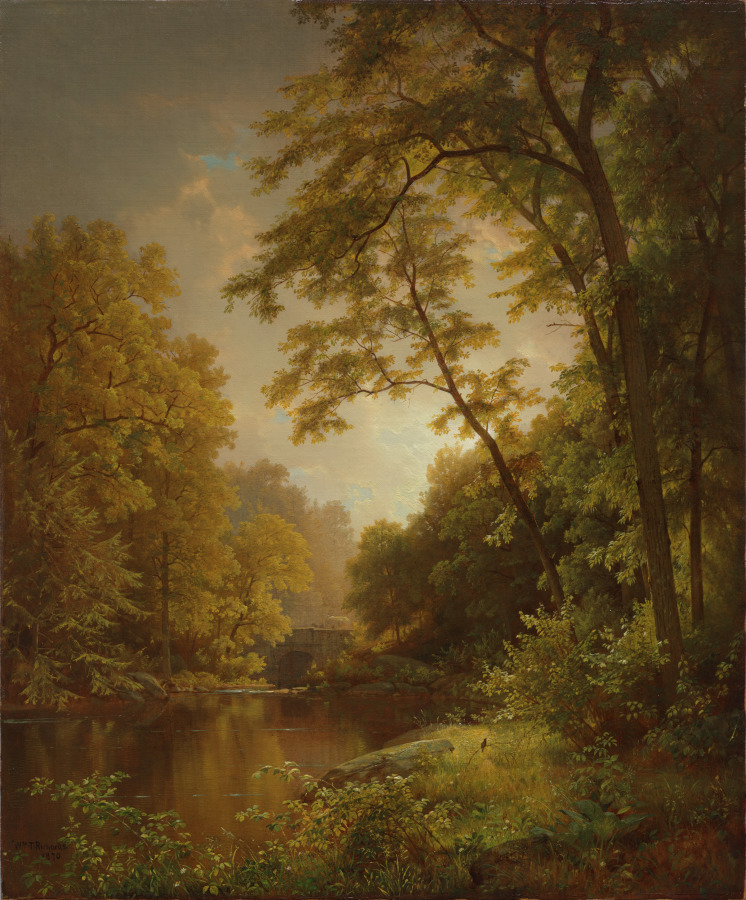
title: June Day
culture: America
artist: William Trost Richards (American, 1833–1905)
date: 1870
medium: oil on canvas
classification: Painting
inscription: signed lower left: Wm T. Richards. / 1870